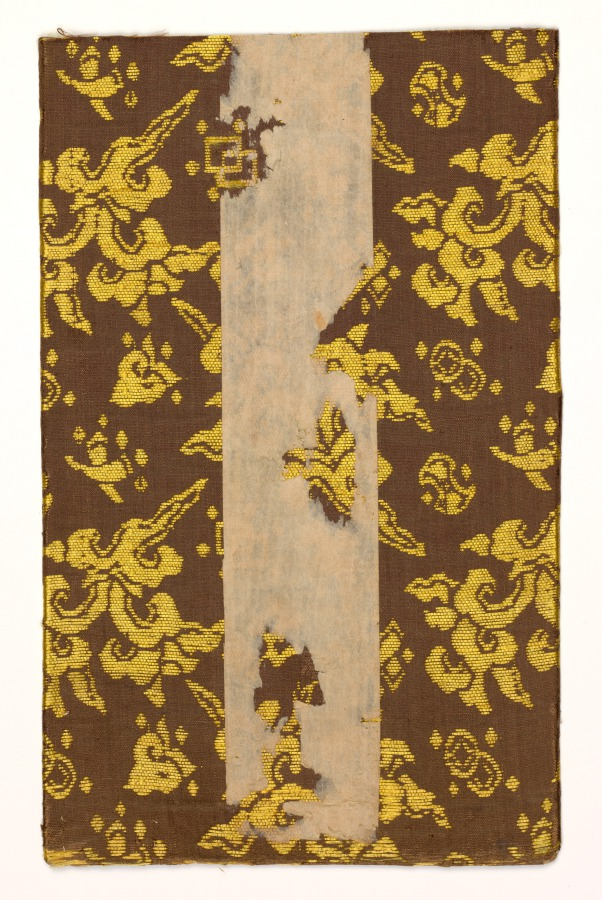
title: Textile Book Cover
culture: Japan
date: 1800s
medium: silk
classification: Textile